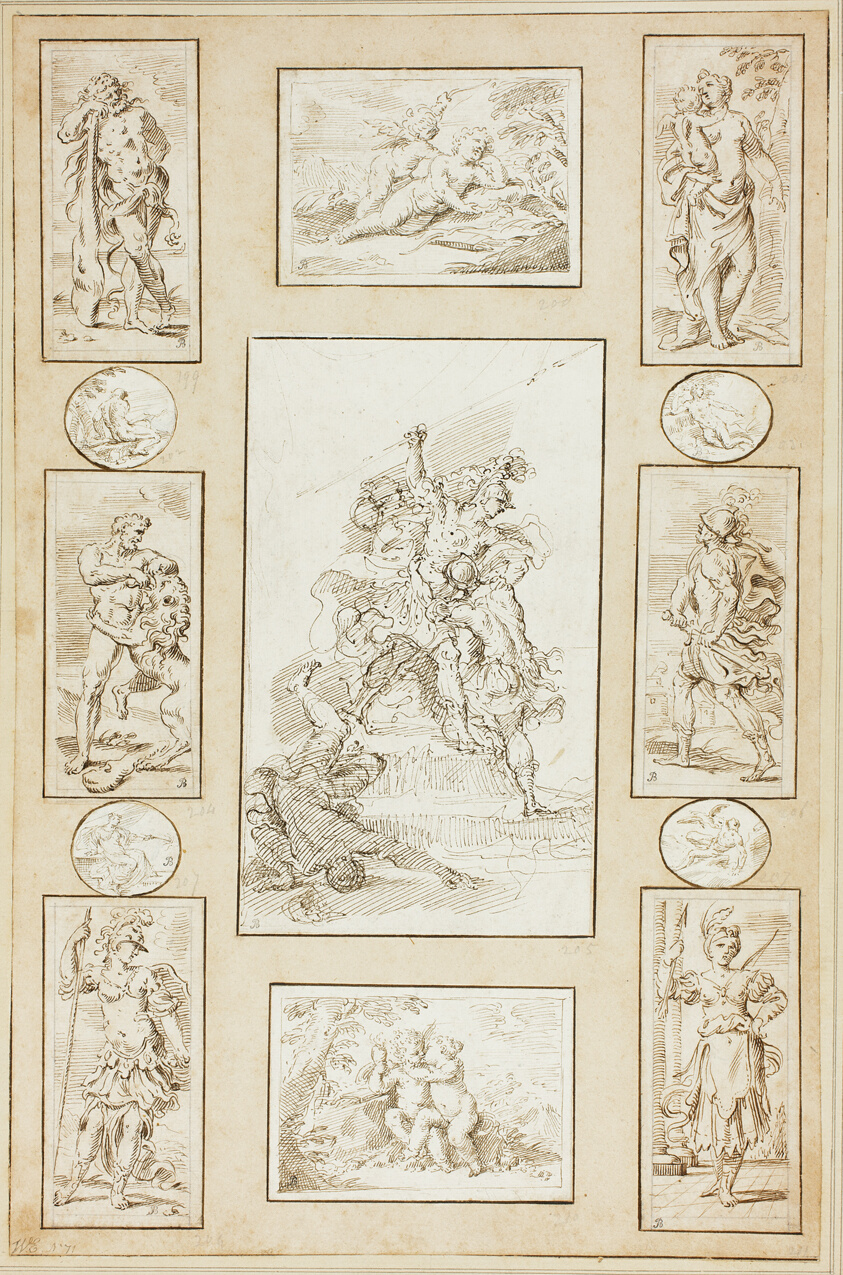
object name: Drawing and Watercolor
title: Antique Warriors and Mythological Subjects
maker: Circle of Donato Creti (Italian, 1671-1749)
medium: Pen and brown ink, with traces of graphite, on 13 sheets of paper laid down on pink tinted laid paper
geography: Italy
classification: drawings (visual works); prints and drawing